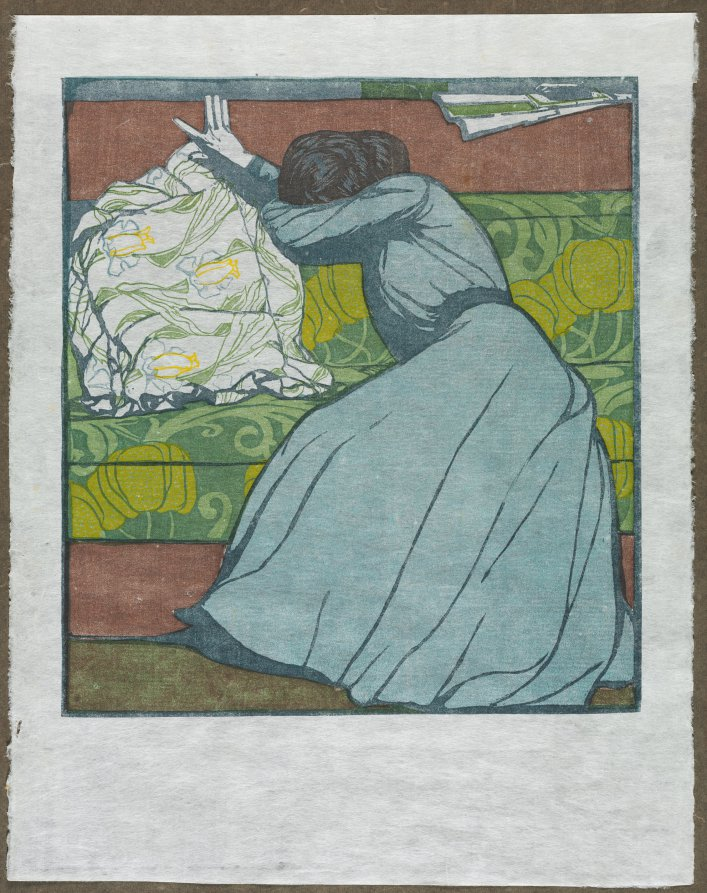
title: The Cushion (Martha Kurzweil Seated on a Divan)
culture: Austria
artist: Max Kurzweil (Austrian, 1867–1916)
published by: Gesellschaft Fur Vervielfaltigende Kunst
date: 1903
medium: color woodcut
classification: Print